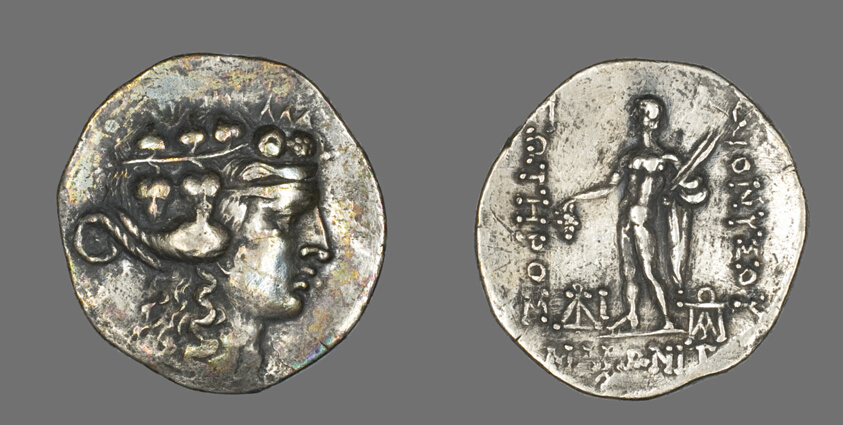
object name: Coin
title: Tetradrachm (Coin) Depicting the God Dionysos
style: hellenistic, ancient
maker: Greek, minted in Maroneia, Thrace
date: after 146 BCE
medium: Silver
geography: Roman Empire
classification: coin; ancient art